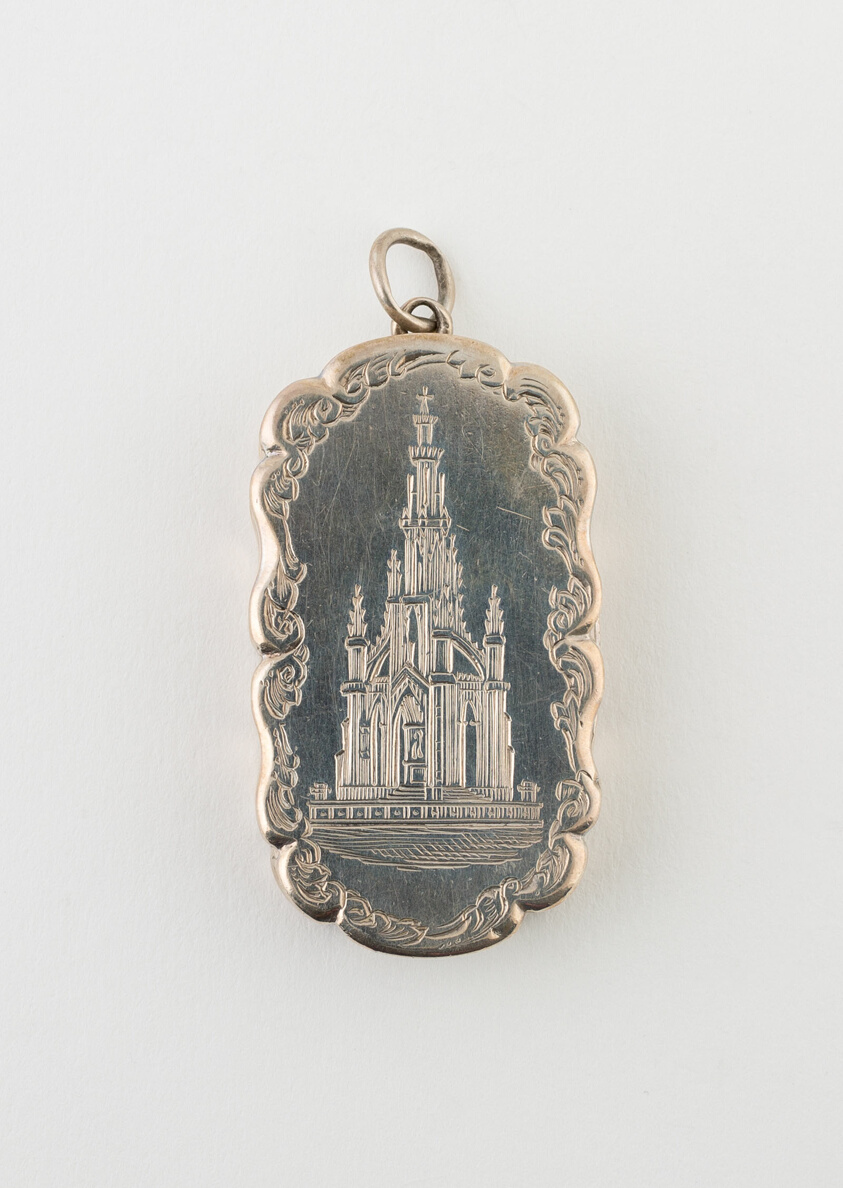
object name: Metalwork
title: Vinaigrette with View of Sir Walter Scott Memorial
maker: Marked FM; Birmingham, England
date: c. 1876/77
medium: Silver and silver gilt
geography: Birmingham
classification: container for personal use; vinaigrette (container for health care); european decorative arts; metalwork; silver; decorative object/ornament